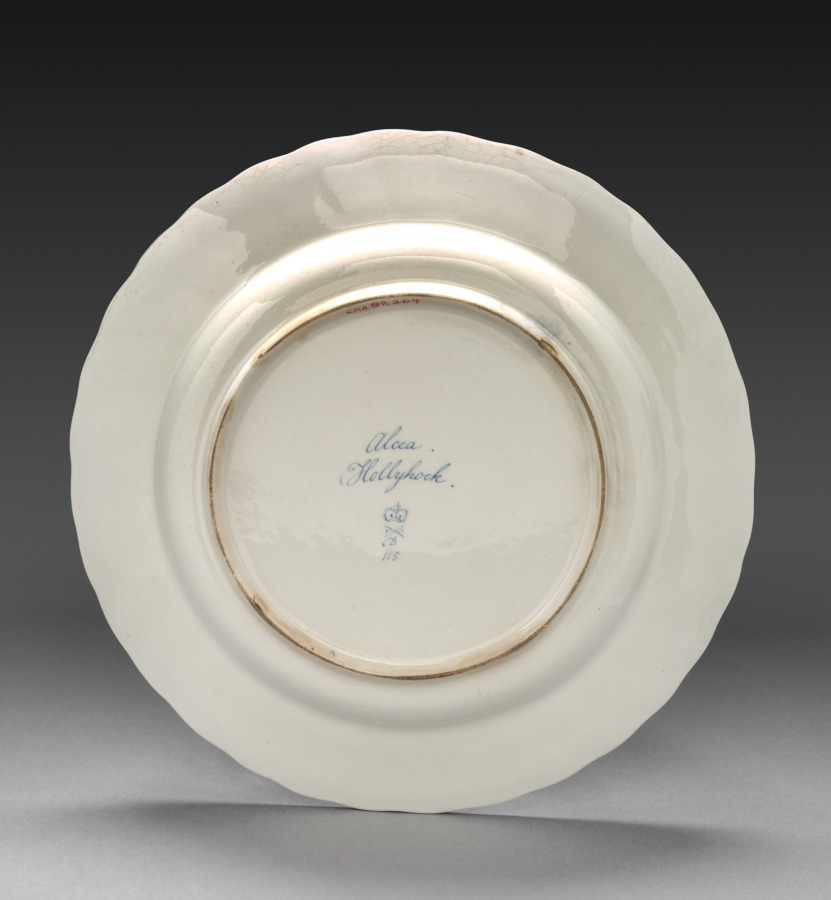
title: Plate from Dessert Service: Hollyhock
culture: England, Derby, 18th century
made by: Derby (Crown Derby Period) (British)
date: c. 1800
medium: porcelain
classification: Ceramic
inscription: inscribed in blue on back: Alcea./Hollyhock./crown/crossed batons and dots/D/115. Near edge: 9.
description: Each dish is decorated with recognizable plants, the names of which are inscribed on the base in both Latin and English. Identifying the blossoms only became customary in the late 18th century when a single piece of porcelain was decorated with one species, and flowers were represented along with leaves, stems, seed pods, and roots. All of this reflects Carolus Linnaeus’s recent invention of a scientific method to categorize all known flora. The decorations on the Derby factory’s products derive from contemporary English botanical publications. For instance, illustrations in William Curtis’s The Botanical Magazine served as models for the French marigold and nettle-leaved bell flower on the dessert service.